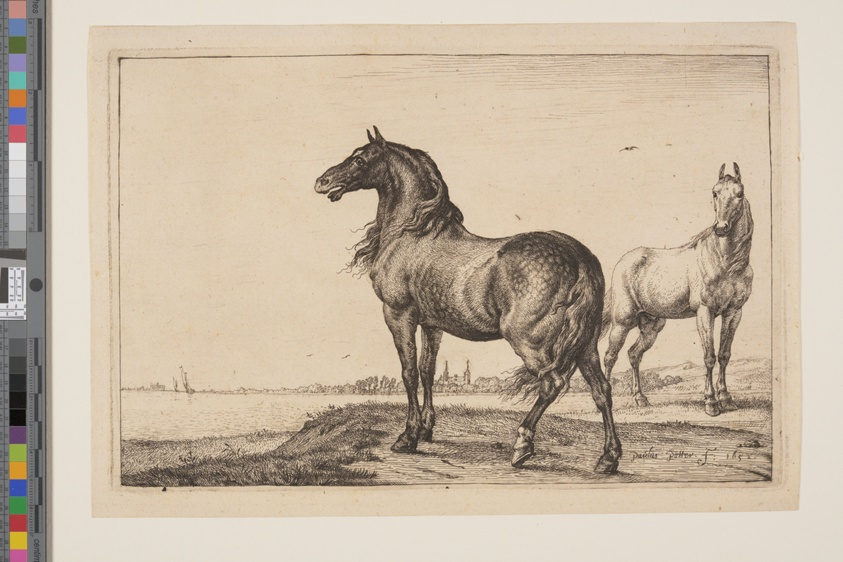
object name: Print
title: The Cropped Horse, from Series of Horses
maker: Paulus Potter (Dutch, 1625–1654)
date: 1652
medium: Etching on ivory laid paper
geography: Netherlands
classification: print; paper; prints and drawing; etching